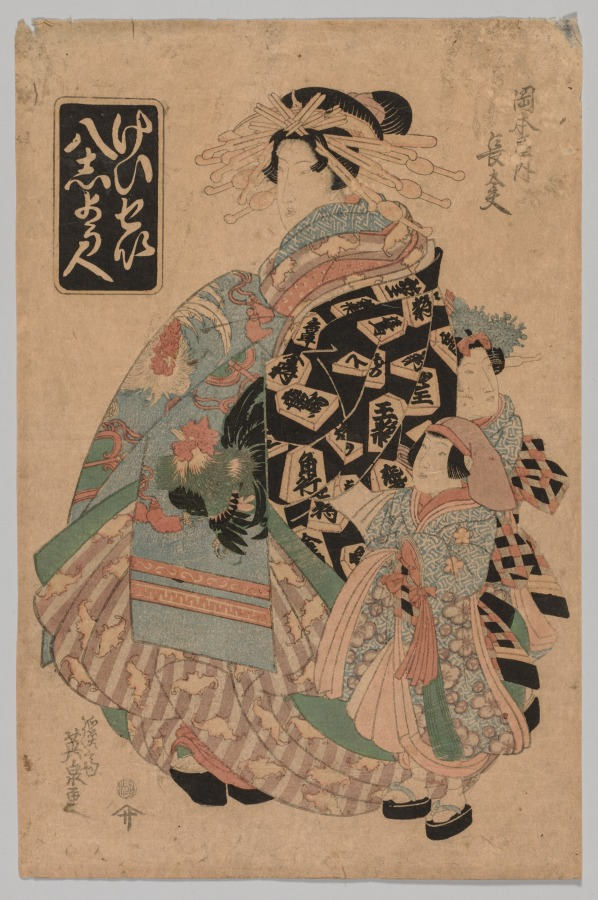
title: Chōdayu of the Okamotoya from the series ?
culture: Japan, Edo period (1615–1868)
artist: Keisai Eisen (Japanese, 1790–1848)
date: 1790–1848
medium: color woodblock print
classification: Print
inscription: 岡本屋内長太夫